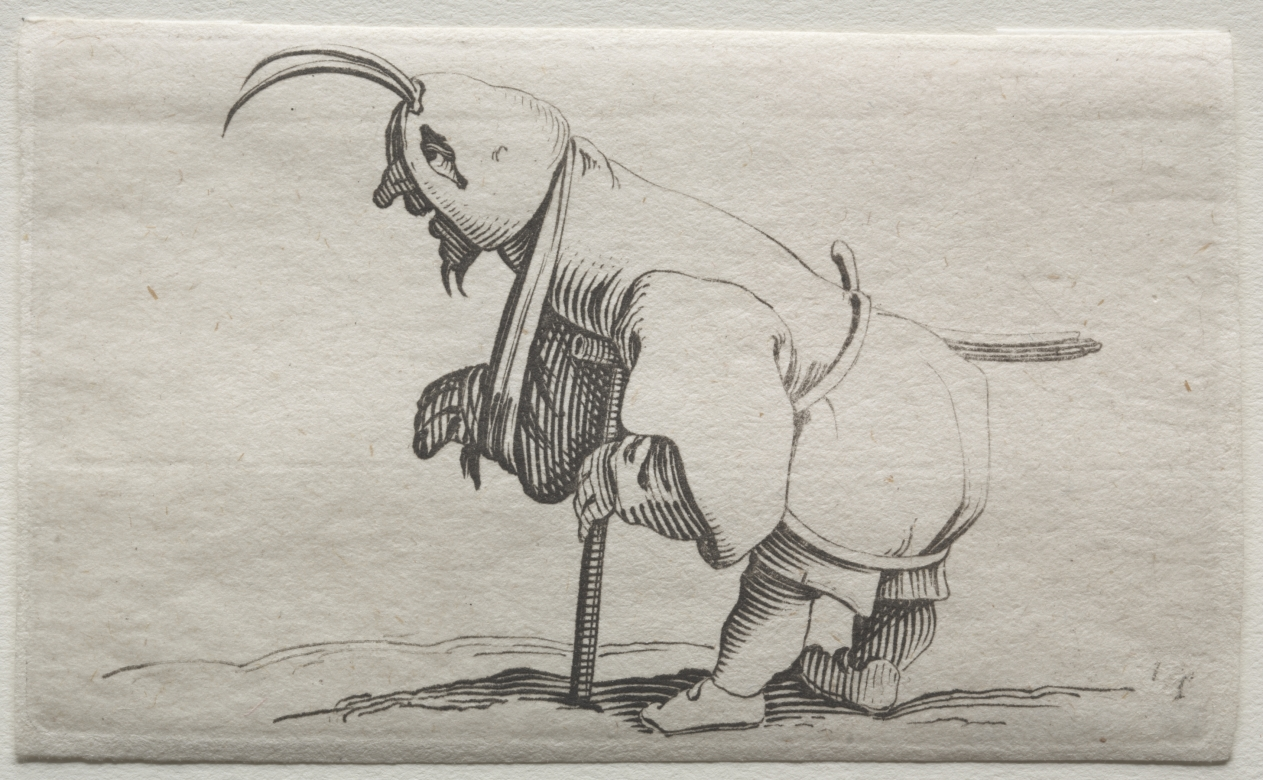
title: Varie figure gobbi di Iacopo Callot (Cripple with a hood)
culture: France, 17th century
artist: Jacques Callot (French, 1592–1635)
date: c. 1621–25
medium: etching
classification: Print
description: This image was published by Callot in 1621 as part of a series of 21 prints depicting gobbi (people with curved backs). The series was titled Varie figure gobbi di Jacopo Callot fatto in Firenza l'anno 1616 (Various hunchbacks by Jacopo Callot, made in Florence in 1616). The figures in the series are reminiscent of character tropes that were popular in the theatrical genre known as the commedia dell’arte (comedy of the profession). As the name suggests, the comedy of this genre was predicated on the assumption that the viewer occupied a different social class than the characters depicted.